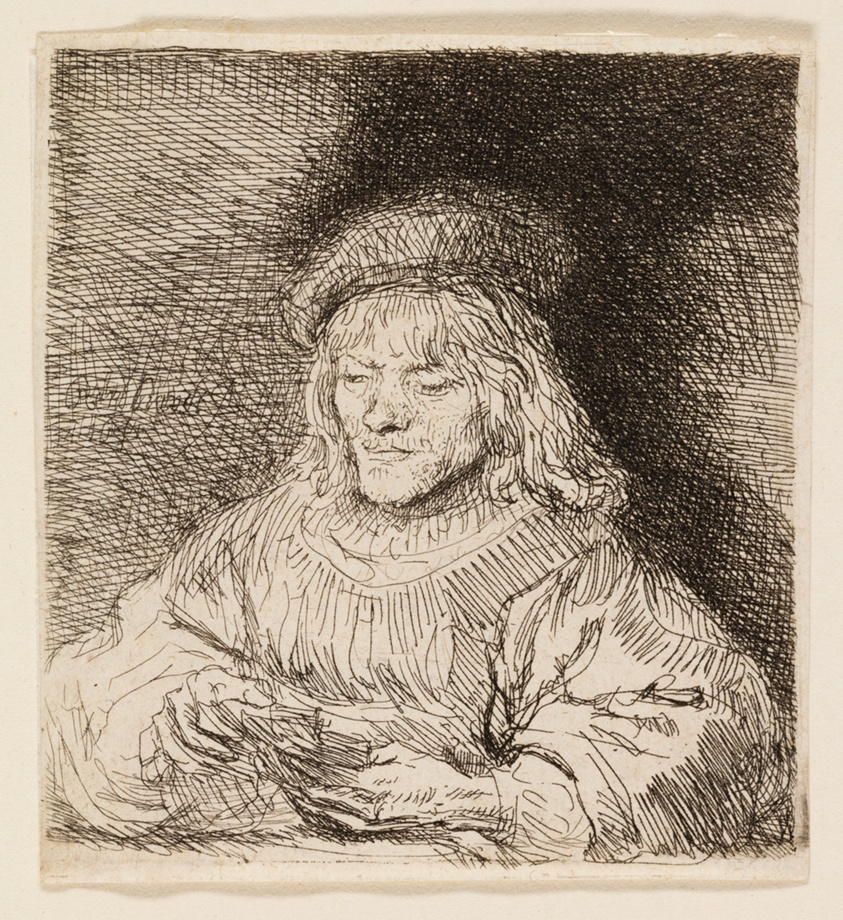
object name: Print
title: The Card Player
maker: Rembrandt van Rijn (Dutch, 1606-1669)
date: 1641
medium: Etching on paper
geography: Holland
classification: etching; print; prints and drawing; paper